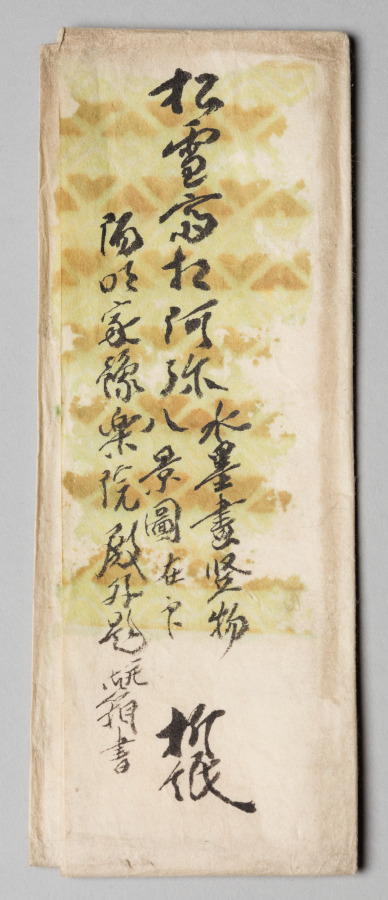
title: Landscape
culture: Japan, Edo period (1615–1868)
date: early 1600s to mid-1800s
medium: hanging scroll; ink on paper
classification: Painting